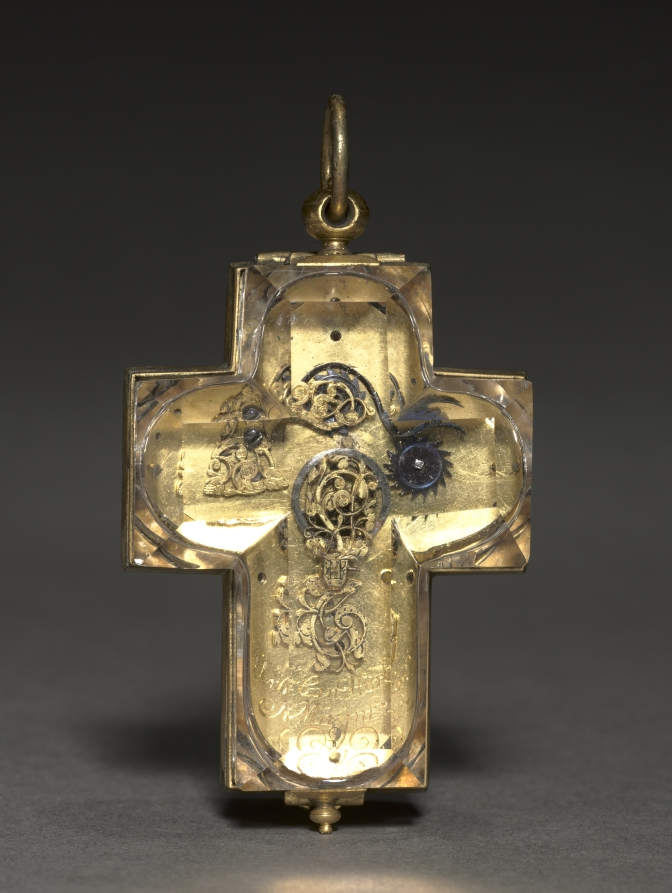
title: Cross-Shaped Clock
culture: Germany, late 16th-early 17th Century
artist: Urban Hörle (German)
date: c. 1600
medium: gilt copper, steel, and rock crystal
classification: Jewelry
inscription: inscribed: Urban Hörle, Mäyntz.